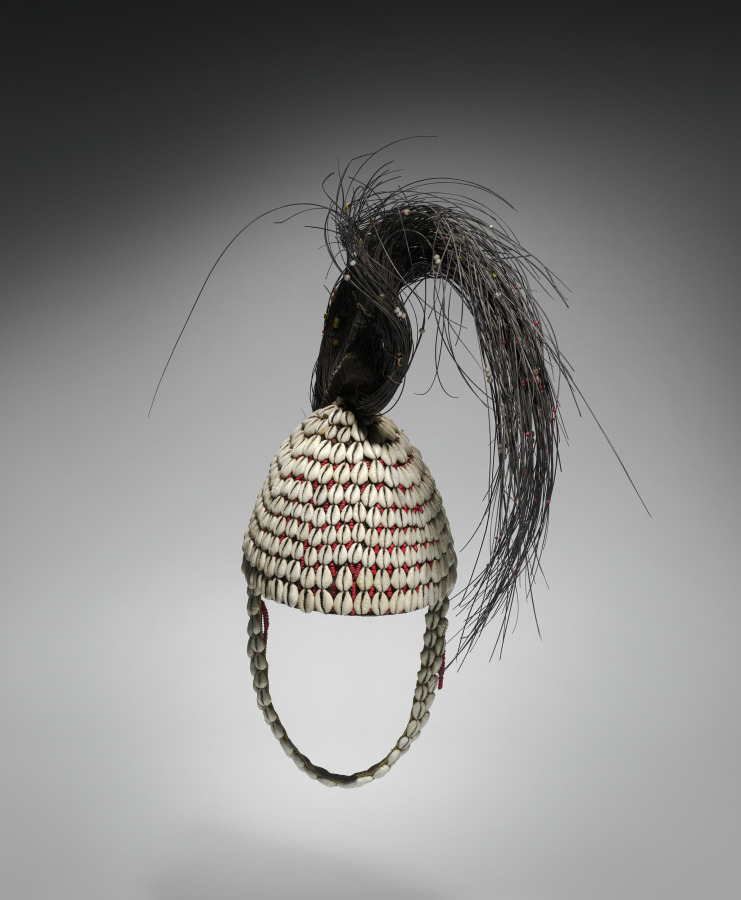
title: Bwami Prestige Cap (Mukuba or Nkumbu)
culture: Africa, Central Africa, Democratic Republic of Congo, Lega-style maker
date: early to mid-1900s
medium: Plant fibers, elephant rawhide and hair, cowrie shells, glass beads, and cord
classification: Garment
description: Hats of different types, sizes, and materials figure prominently in the Lega people’s Bwami association where they indicate status and rank. Cone-shaped hats made of canvas covered with cowrie shells and surmounted by an elephant tail are worn during initiations into kindi, the highest of the five male grades. This prestige cap uses a variety of local and imported materials to show its wearer's importance. The plant fibers that support the hat and the elephant hair were sourced in Central Africa, while the beads and cowrie shells were imported. The beads were made in Europe, while the cowrie shells came from the Indian Ocean region. The might of Bwami members is likened to the elephant’s potentially destructive strength.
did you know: While identified with Africa, cowrie shells were generally imported from the Indian Ocean region. After being collected near the Maldives islands, these Indo-Pacific shells entered parts of Africa via overseas trade routes.